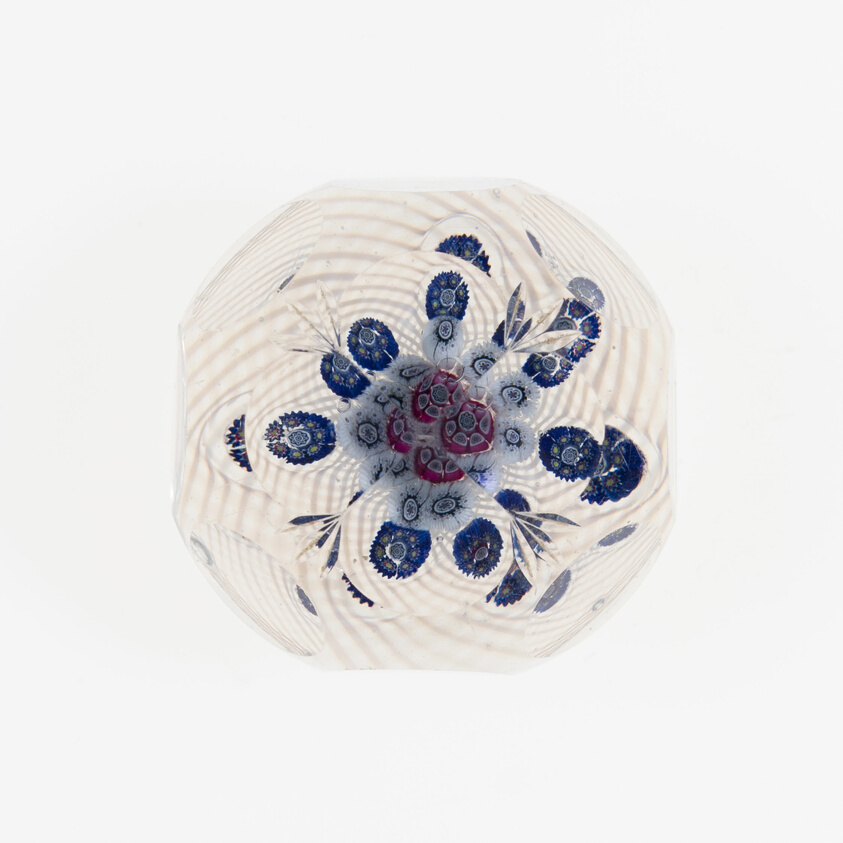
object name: Glass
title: Paperweight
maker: New England Glass Company (Cambridge, Massachusetts, 1818-1888)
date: Late 19th century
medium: Glass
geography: United States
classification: paperweight; millefiori; european decorative arts; glass